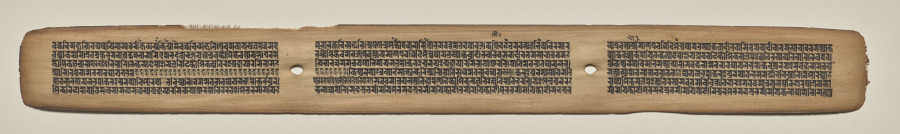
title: Text, folio 160 (recto), from a Manuscript of the Perfection of Wisdom in Eight Thousand Lines (Ashtasahasrika Prajnaparamita-sutra)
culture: Eastern India, Bihar, Vikramashila Monastery. Painting: Nepal, Kathmandu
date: Sunday, September 14, 1119 (year 239 of the Newar Samvat in the month of Ashvina)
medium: gum tempera and ink on palm leaves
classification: Painting